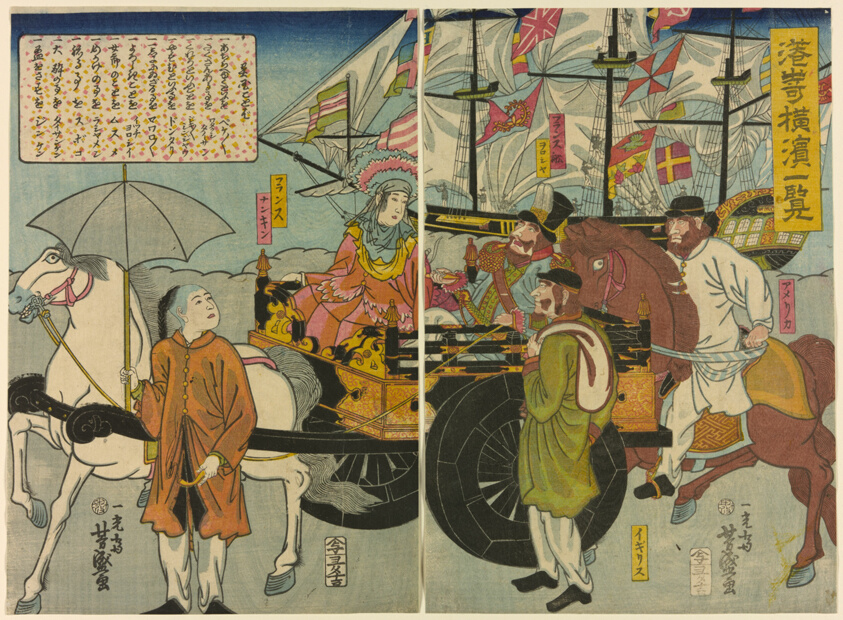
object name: Print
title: View of Miyozaki in Yokohama (Miyozaki Yokohama ichiran)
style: Japanese (culture or style)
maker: Utagawa Yoshimori (Japanese, 1830–1884)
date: 1860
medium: Color woodblock print; oban diptych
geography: Japan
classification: woodblock print; print; asian art